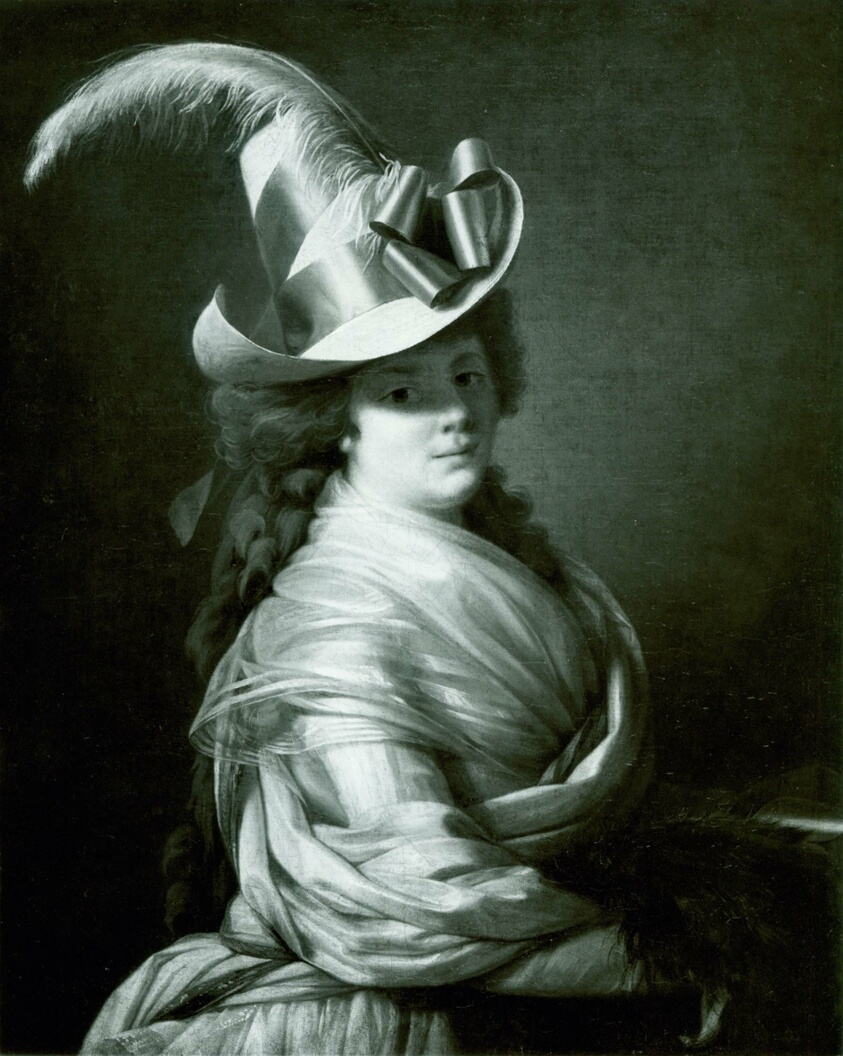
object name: Painting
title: Woman in a Straw Hat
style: 18th Century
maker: Artist unknown (French, active 18th century)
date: c. 1790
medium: Oil on canvas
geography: France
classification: oil on canvas; france; french; oil paintings (visual works); paint; painting; european painting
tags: portraits: female subject, dresses, fashion, French, hat, portrait, portraits